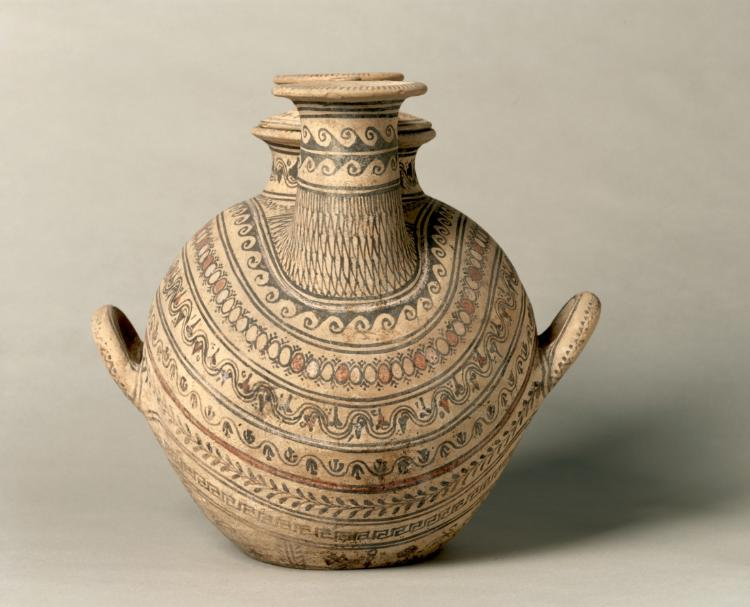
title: Two-Spouted Strainer Askos (Flask) with Lid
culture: South Italian, Daunian or Canosan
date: 300–200 BCE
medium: ceramic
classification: Ceramic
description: Although now referred to by the Greek term askos, because of its resemblance to the animal skins used to hold wine in ancient Greece, this ceramic shape developed in the South Italian region of Daunia (north of Apulia, on the Adriatic coast). This example is unusual for its three openings—one covered by a lid, the others spouted with built-in strainers. Its profusely painted decoration, mostly geometric and vegetal patterns applied in black with added red and white, is arranged in bands that follow the contours of the vessel.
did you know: Each spout has a built-in strainer—one near the top, the other near the bottom.